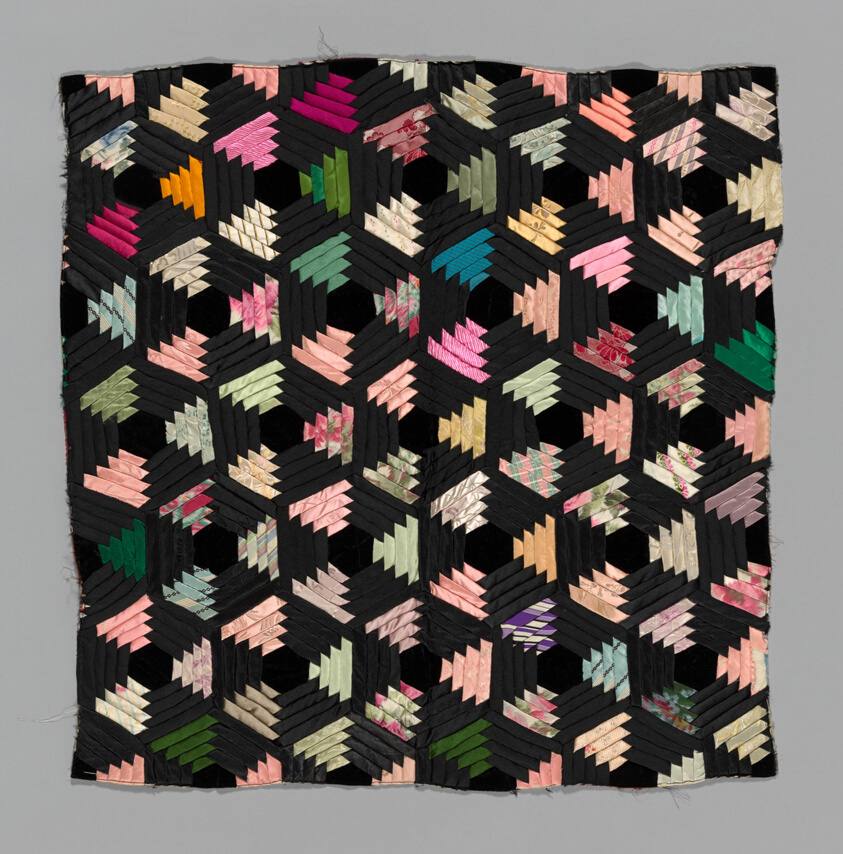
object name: Textile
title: Fragment (from a Bedcover)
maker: United States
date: 1880s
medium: Silk and cotton, plain, twill, and satin weaves; some with supplementary patterning warps or wefts, some self-patterned, some with supplementary pile warps (velvet), and some warp-resist dyed (chiné); pieced; backed with cotton and silk, plain weaves, some with self-patterning and satin weaves; stitched with cotton threads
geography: United States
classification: textile; needlework - quilt